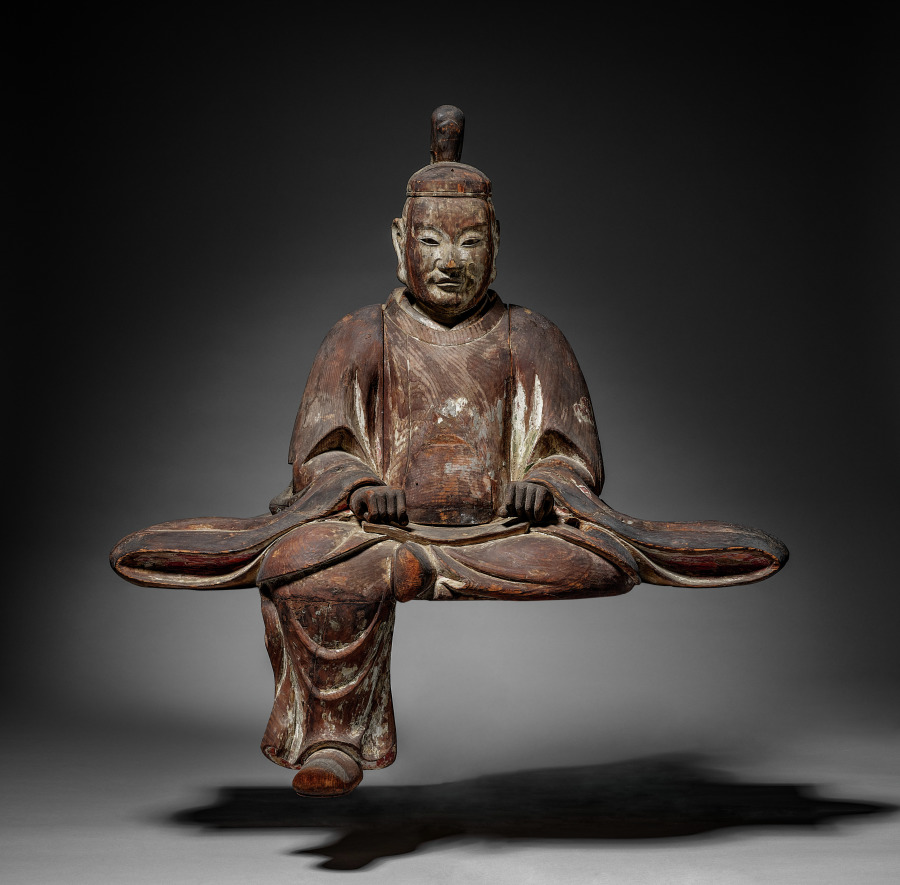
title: One of a Pair of Guardian Figures (Zuishin)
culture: Japan, Muromachi period (1392–1573) to Edo period (1615–1858)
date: c. 1560–1625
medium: Japanese cypress (hinoki) with traces of color; crystal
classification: Sculpture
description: Sculptors carved these two figures to look like members of the guard who protected the Japanese aristocracy in the 10th to 12th centuries. The pair belong in the roofed gate of a Shinto shrine. Their role was to embody the divine protectors of the deities, or kami, residing at the shrine. Their inset crystal eyes make them appear vigilant.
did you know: Some Japanese sculptors used to specialize in inset crystal eyes.